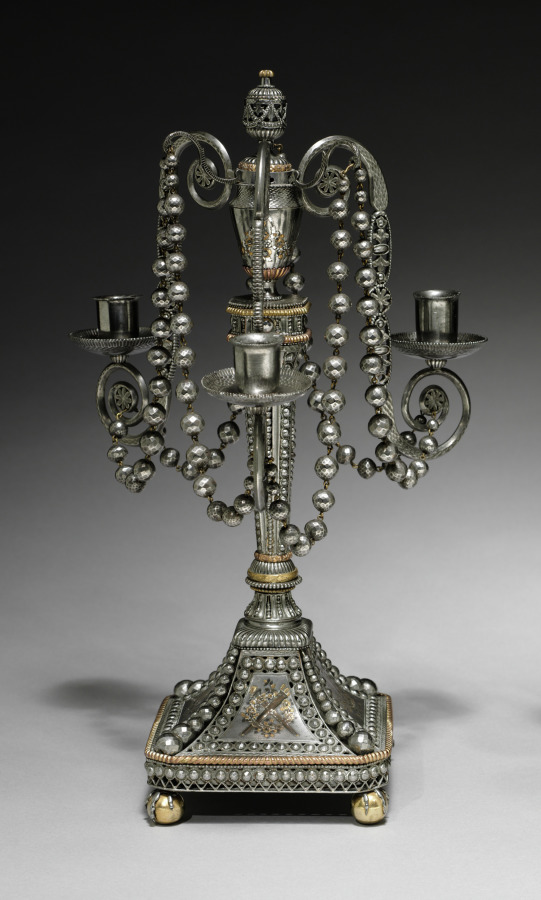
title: Candelabra (1 of 2)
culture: Russia, Tula, Neo-classical, 18th century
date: c. 1790–1795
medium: cut and polished steel with gold and silvered decoration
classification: Metalwork